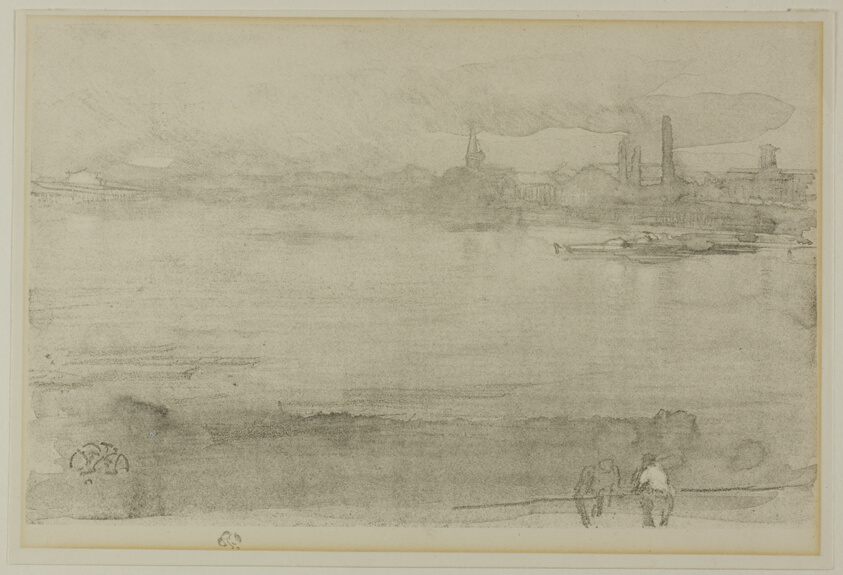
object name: Print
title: Early Morning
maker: James McNeill Whistler (American, 1834-1903)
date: 1878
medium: Lithotint in black ink with scraping, on a prepared half-tint ground, on cream wove paper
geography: United States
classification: lithotint; lithograph; print; prints and drawing; paper